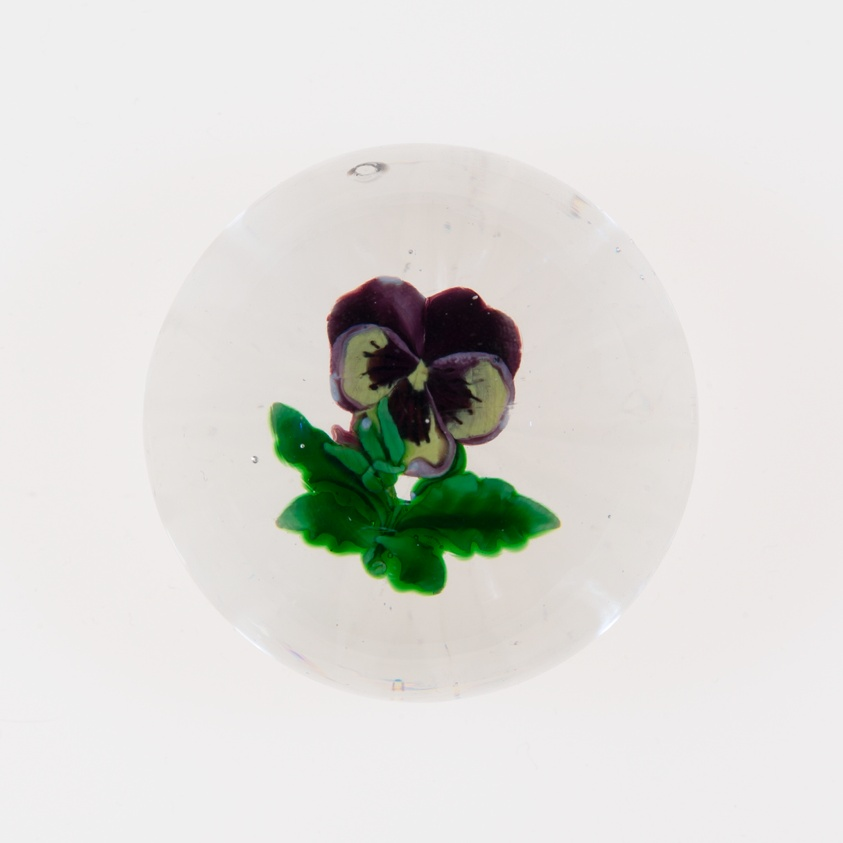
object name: Glass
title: Paperweight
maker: Clichy Glassworks (Cristalleries de Clichy); Clichy, France, 1837-1885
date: 19th century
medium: Glass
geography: France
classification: paperweight; glass